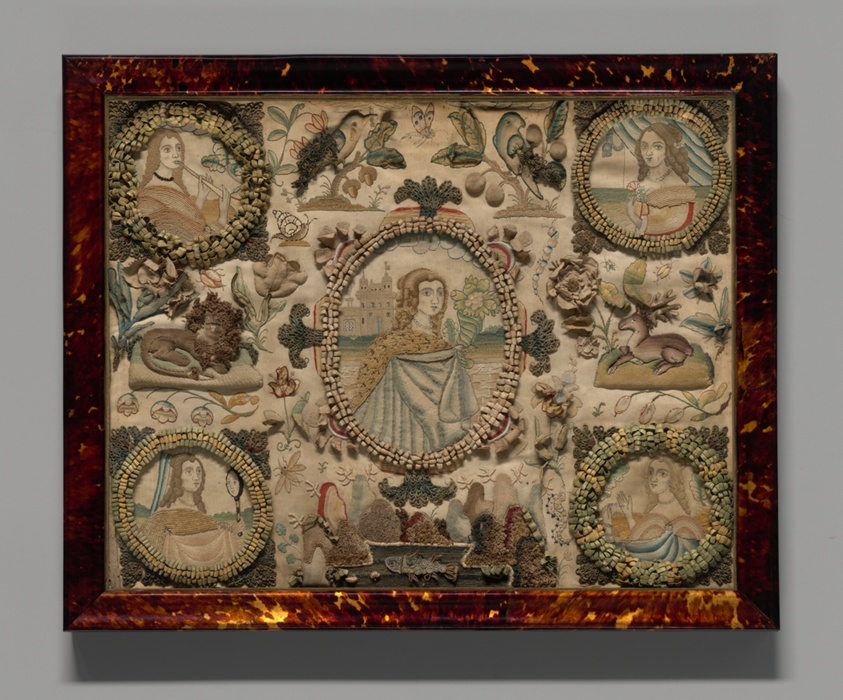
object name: Textile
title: Needlework (Depicting the Five Senses)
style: 17th Century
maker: England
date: 1601/25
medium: Silk, satin weave; embroidered in silk floss foremost in buttonhole, couched, knot, padded and outlining, "purl" and satin stitches; chenille; areas of raised work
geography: England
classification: needlework (visual works); textile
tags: women, animals, birds, castles, deer, fish, foliage, lions, mirror, musical instruments, portrait, snail, snakes